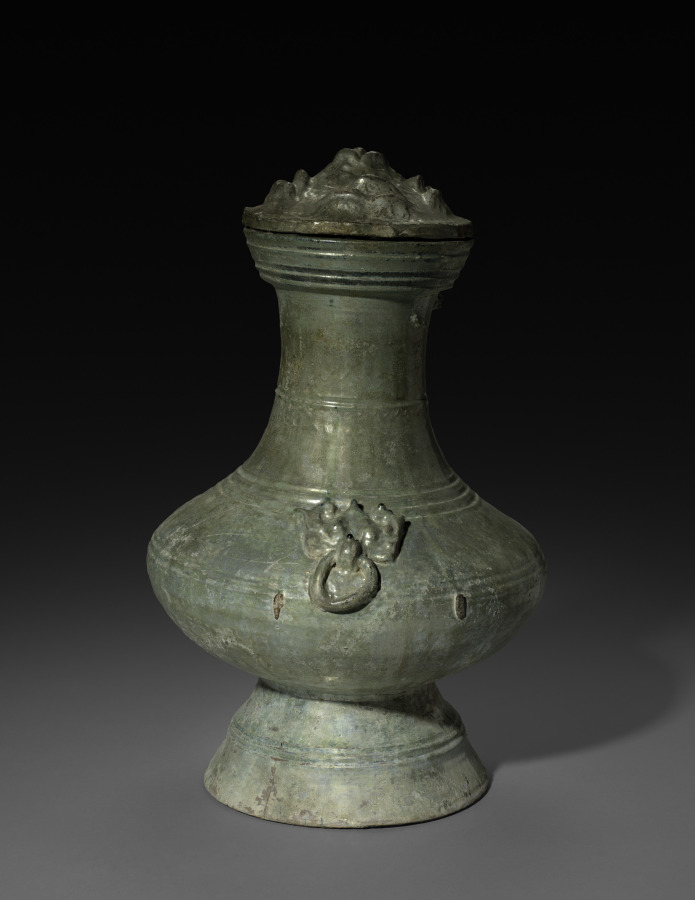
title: Covered Jar (Hu)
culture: China, Eastern Han dynasty (25–220 CE)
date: 25–220 CE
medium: earthenware with lead glaze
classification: Ceramic